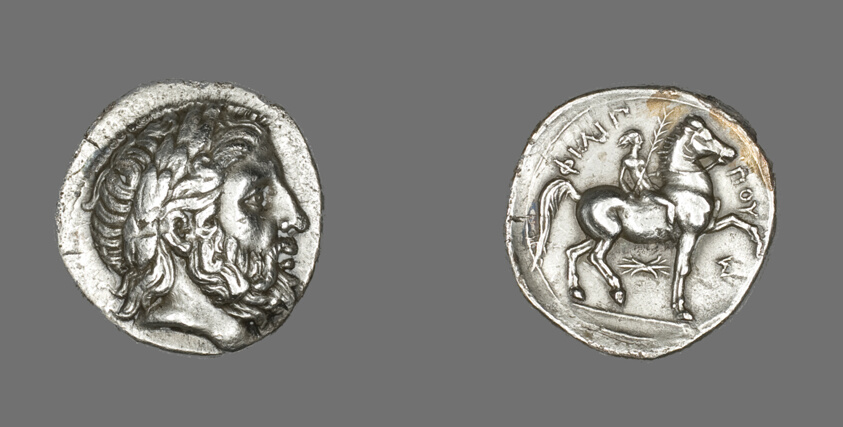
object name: Coin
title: Tetradrachm (Coin) Depicting the God Zeus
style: greek, ancient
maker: Greek; minted in Pella, ancient Macedonia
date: 348-336 BCE, issued by King Philip II of Macedonia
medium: Silver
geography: Pella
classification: coin; ancient art